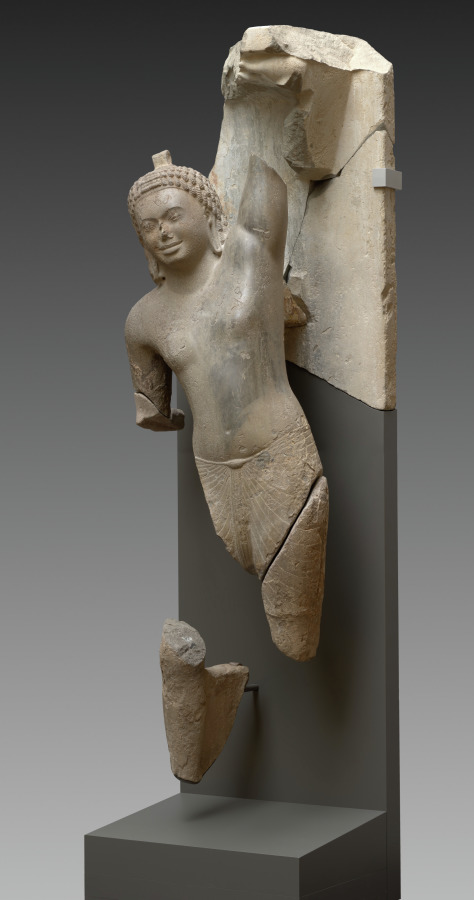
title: Krishna Lifting Mount Govardhan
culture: Southern Cambodia, Takeo Province, Phnom Da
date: c. 600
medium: Sandstone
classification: Sculpture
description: This masterwork of early Cambodian sculpture shows the Hindu god Krishna effortlessly holding aloft a mountain to protect his fellow villagers and herds from torrential storms sent by a jealous old god. It is one of eight monumental monolithic figures recovered from a two-peaked mountain in the floodplains of the Mekong River delta, on the outskirts of the ancient urban center of Angkor Borei.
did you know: Gold earrings were once fastened to the sculpture using holes in the figure's earlobes.